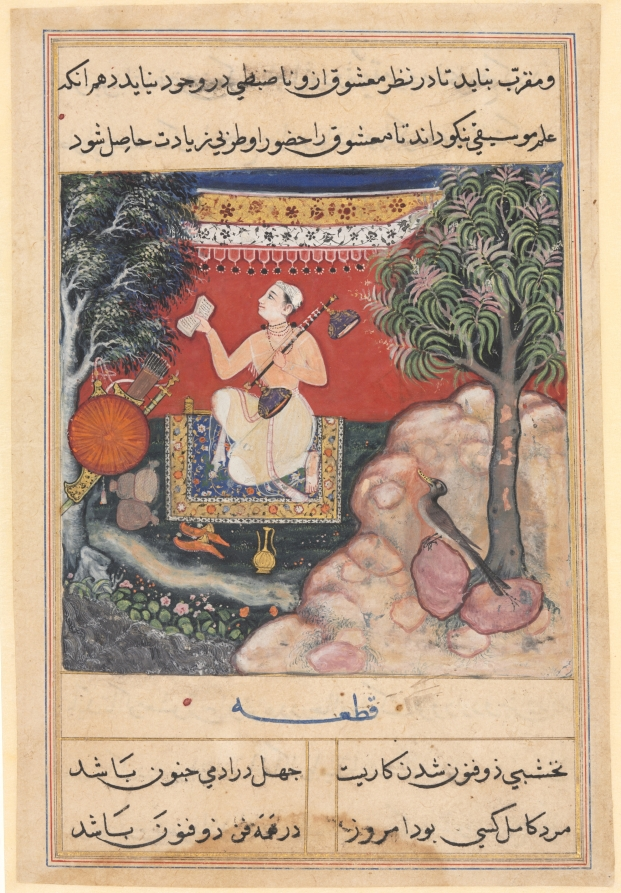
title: The origin of music from a fabulous bird of India which had seven holes in its beak, from a Tuti-nama (Tales of a Parrot): Fourteenth Night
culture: Mughal India, court of Akbar (reigned 1556–1605)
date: c. 1560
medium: gum tempera, ink, and gold on paper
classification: Painting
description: This story tells of a fantastical bird called a qaqnos who emitted sonorous tones from its beak when joyful. From these sounds, the science of music was developed. In the image, a man holding a book in one hand and an instrument called a vina in the other crouches beneath a tasseled canopy. His weapons, a quiver, sword, and shield hang in the tree nearby.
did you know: The illegible writing on the musician’s book seems derived from an Indian script, rather than Arabic or Persian.